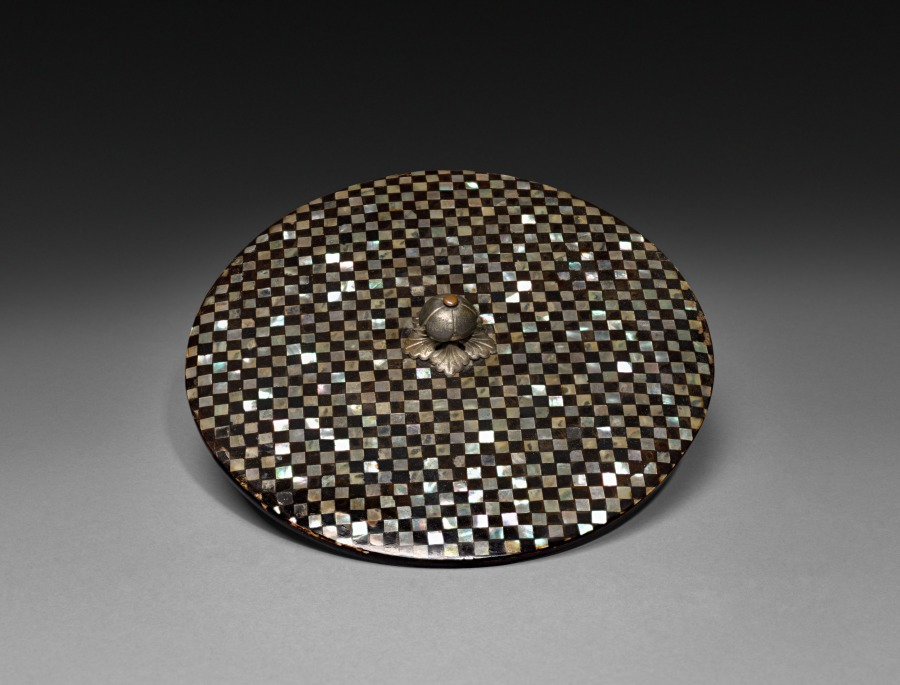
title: Wine Ewer (lid)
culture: Japan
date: late 1700's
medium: lacquer, nacre and metal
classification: Lacquer